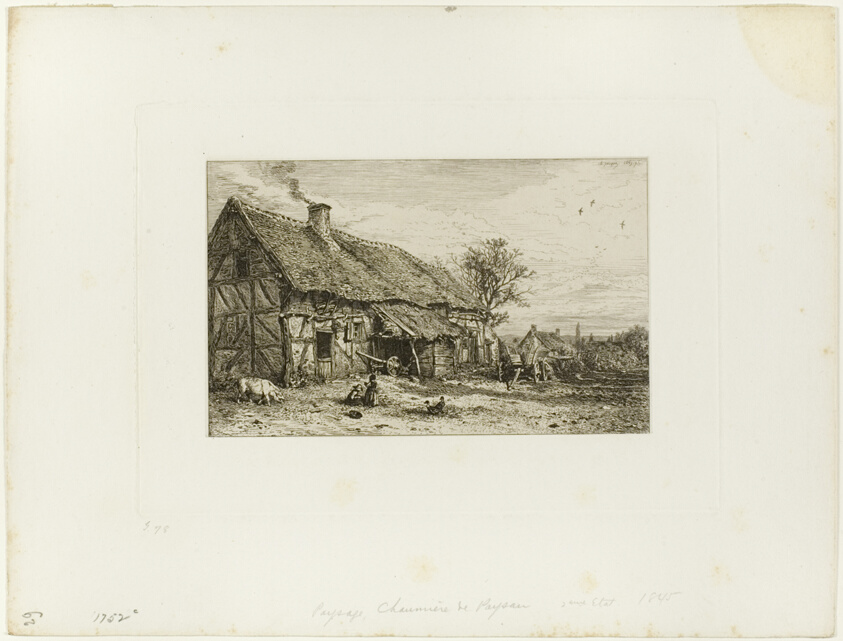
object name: Print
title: Lanscape with Peasant Dwelling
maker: Charles Émile Jacque (French, 1813-1894)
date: 1845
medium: Etching, engraving and drypoint on cream China paper laid down on ivory wove paper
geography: France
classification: etching; print; prints and drawing